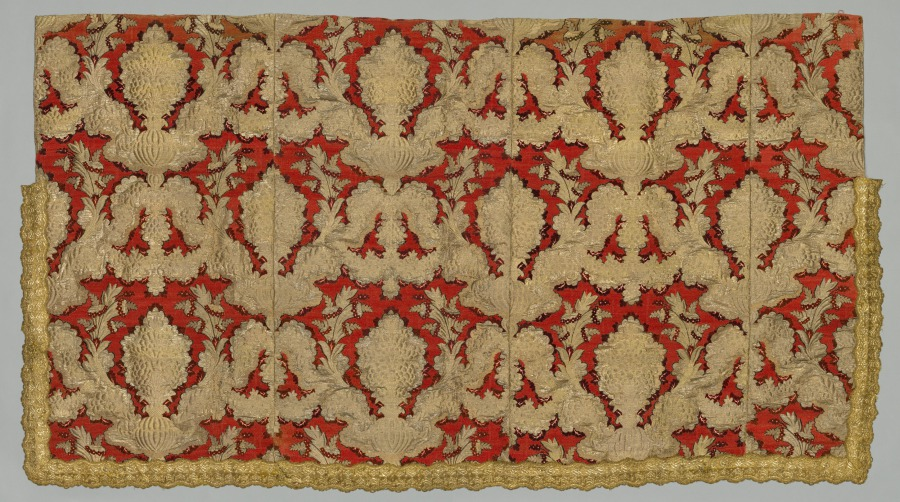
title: Altar Frontal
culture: Russia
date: 1700s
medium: Silk and metal: brocade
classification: Textile